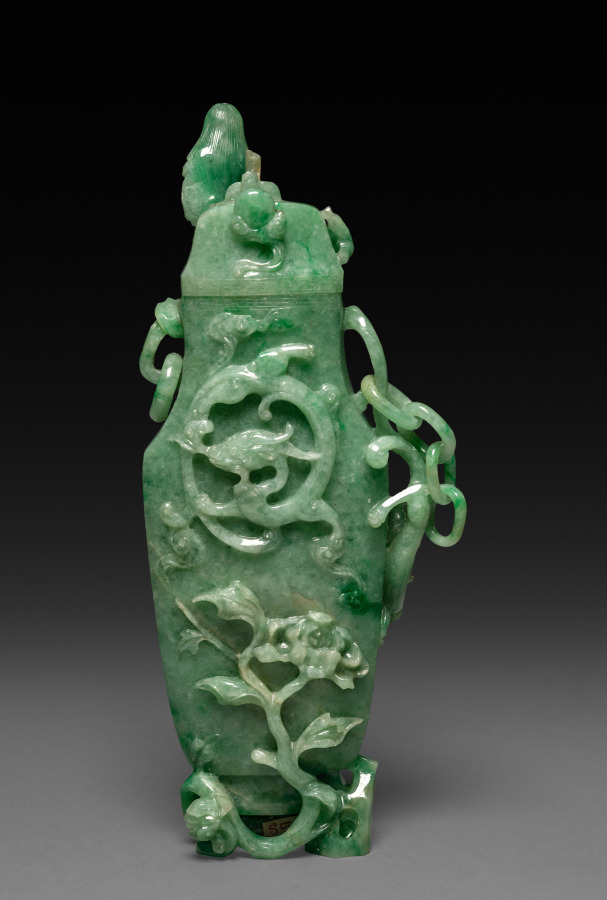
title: Three-Sectional Altar Group: Cylindrical Carving with Phoenix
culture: China, Qing dynasty (1644-1911)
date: 1644–1911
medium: jade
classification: Jade